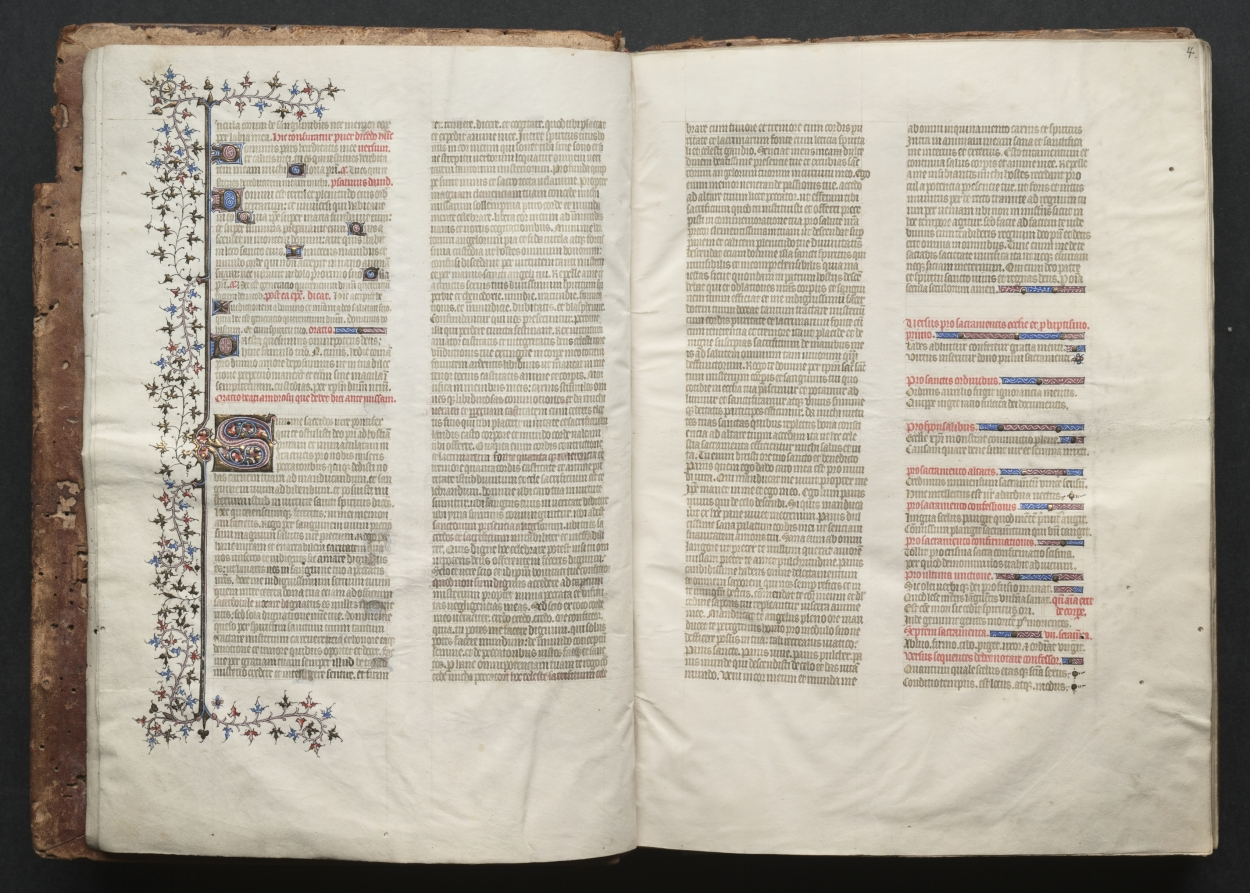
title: The Gotha Missal: Fol. 3v, Text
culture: France, Paris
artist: Master of the Boqueteaux (French)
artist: and Workshop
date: c. 1375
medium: ink, tempera, and gold on vellum; blind-tooled leather binding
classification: Bound Volume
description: The style and quality of this manuscript's decoration is typical of deluxe Parisian books made for aristocratic or royal patrons. Most of the book's decoration appears to be the work of the Master of the Boqueteaux, an artist active at the court of King Charles V (died 1380). His style was apparently shared by a number of book illuminators working in and around Paris. It is very possible that the Gotha Missal belonged to Charles V, but is not provable because the manuscript has no royal portraits and lacks a colophon. Given the book's magnificent decoration, however, it would seem that it was produced for a Valois prince, if not for the king himself. The manuscript receives its name from the German dukes of Gotha, its later owners.